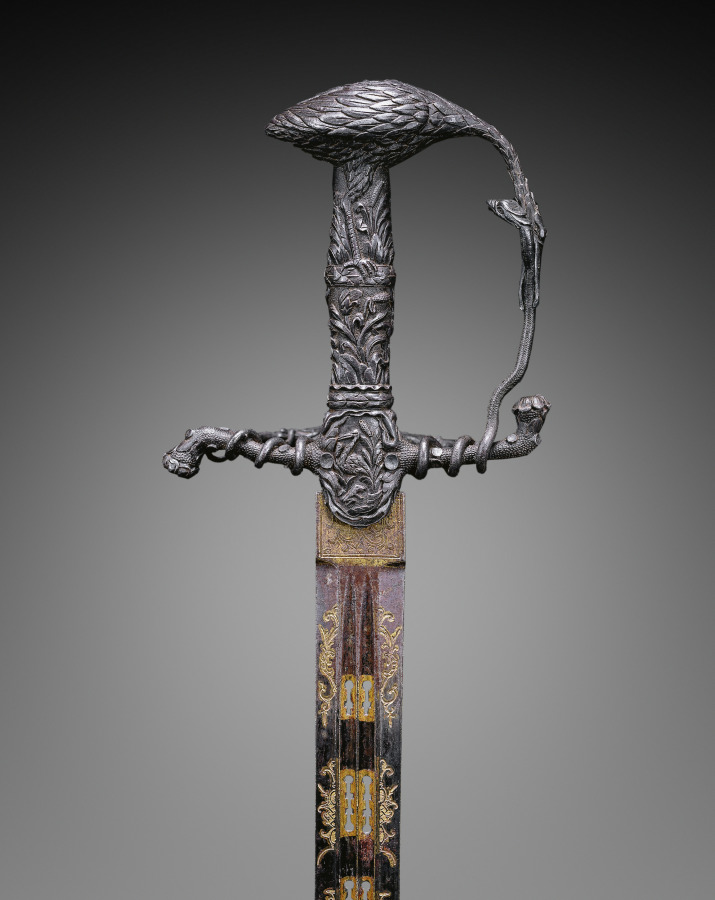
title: Rapier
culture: Germany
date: c. 1630–50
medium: steel; blued, gilded, and perforated blade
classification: Arms and Armor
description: The rapier was a sword worn with civilian dress and used in duels. The term rapier derives from a 16th-century French word rapière, which in turn derived from the Spanish espada ropera, or “dress sword.” The rapier was a light weapon with a straight double-edged and pointed blade that, with the development of the art of fencing in the 1500s and 1600s, gradually became narrower and lighter, and thus suitable for thrusts only. With the new technique of swordplay emphasizing the point of the blade, sword guards became more complex to protect the duelist’s unarmored hand. These elaborate guards were frequently decorated by various techniques—chiseling, bluing, russeting, and damascening.